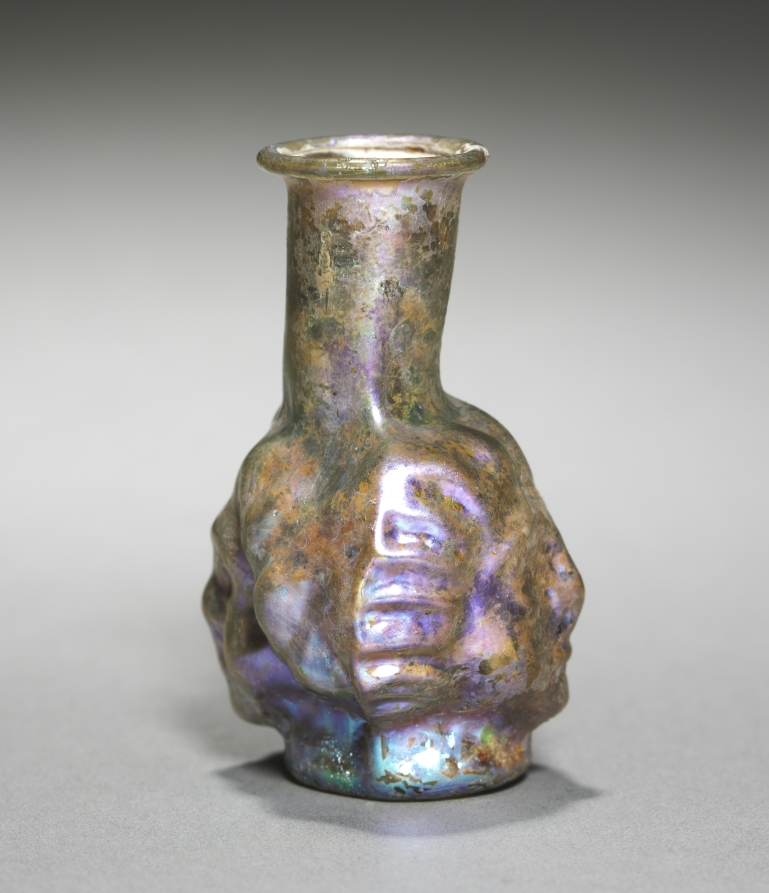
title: Janiform Head Flask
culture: Roman, probably Eastern Mediterranean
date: 100–400 CE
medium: glass, mold-blown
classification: Glass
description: Called Janiform after Janus, the two-faced Roman god associated with doorways and beginnings, two-faced head flasks like this were popular across the Roman Empire. The faces themselves, quite similar to one another, could both represent Janus, although he is typically bearded and here the gender is unclear. Some other two-faced head flasks clearly differentiate between the two sides, showing one serious, the other smiling.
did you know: The iridescence covering much of the surface obscures the original violet-like color.